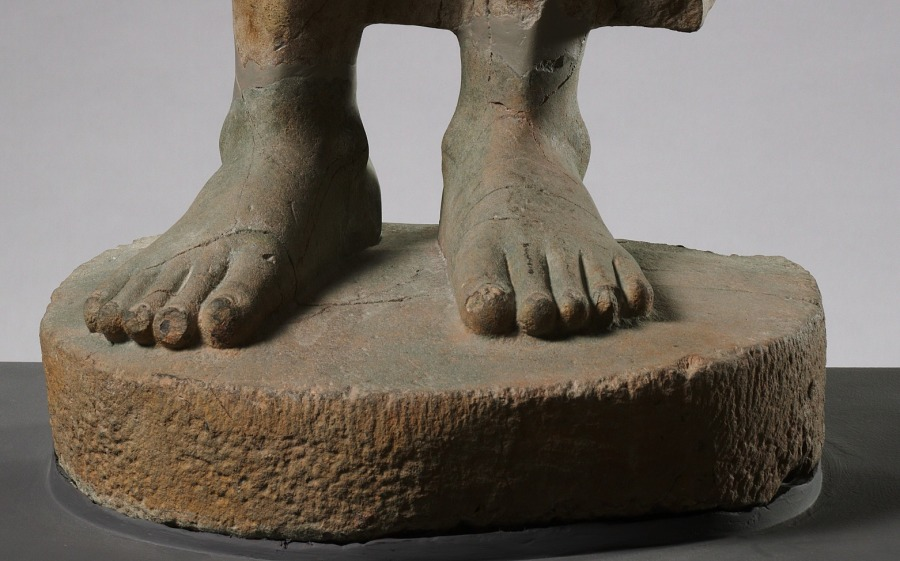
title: Feet for Standing Buddha (1973.15)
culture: Thailand, Mon-Dvaravati Period, c. 7th Century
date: c. 600s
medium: sandstone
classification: Sculpture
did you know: Now united for display, CMA acquired the sculpture in two pieces, when the body (CMA 1973.15) and the feet were found in separate locations.